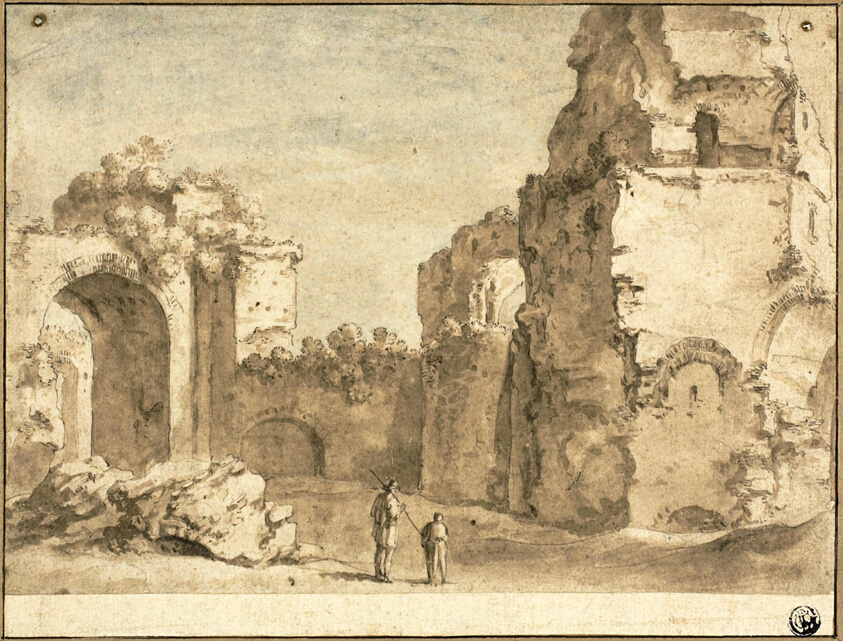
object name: Drawing and Watercolor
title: Roman Ruins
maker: Circle of Bartholomeus Breenbergh (Dutch, 1598-1657)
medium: Pen and brown ink, with brush and brown and blue-gray wash, over traces of graphite, on ivory laid paper, laid down on board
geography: Holland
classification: ink or chalk wash; drawings (visual works); prints and drawing